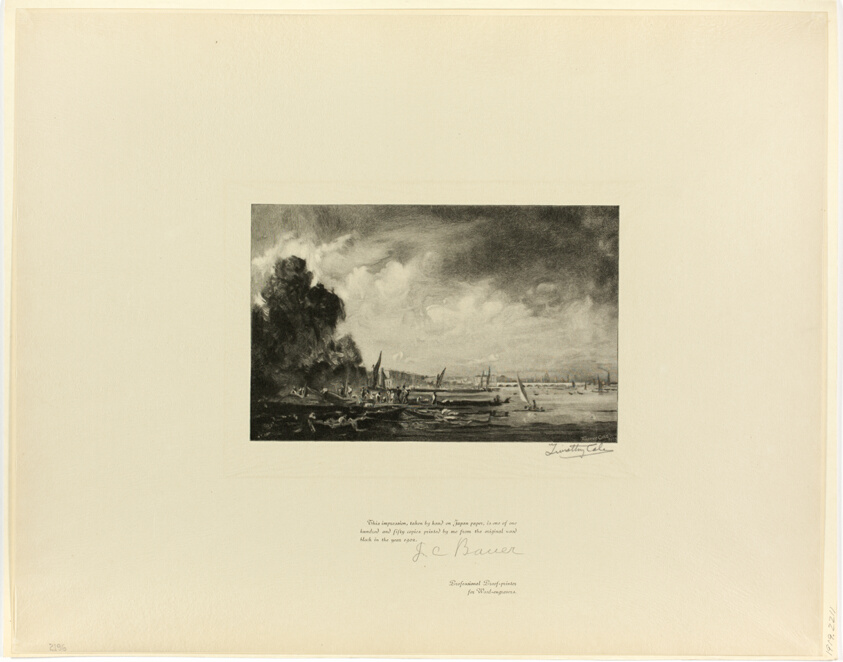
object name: Print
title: Waterloo Bridge (a sketch), from Old English Masters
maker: Timothy Cole (American, born England, 1852-1931); after John Constable (English, 1776-1837)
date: 1900, printed 1902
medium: Wood engraving on chine paper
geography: United States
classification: wood engraving; print; prints and drawing